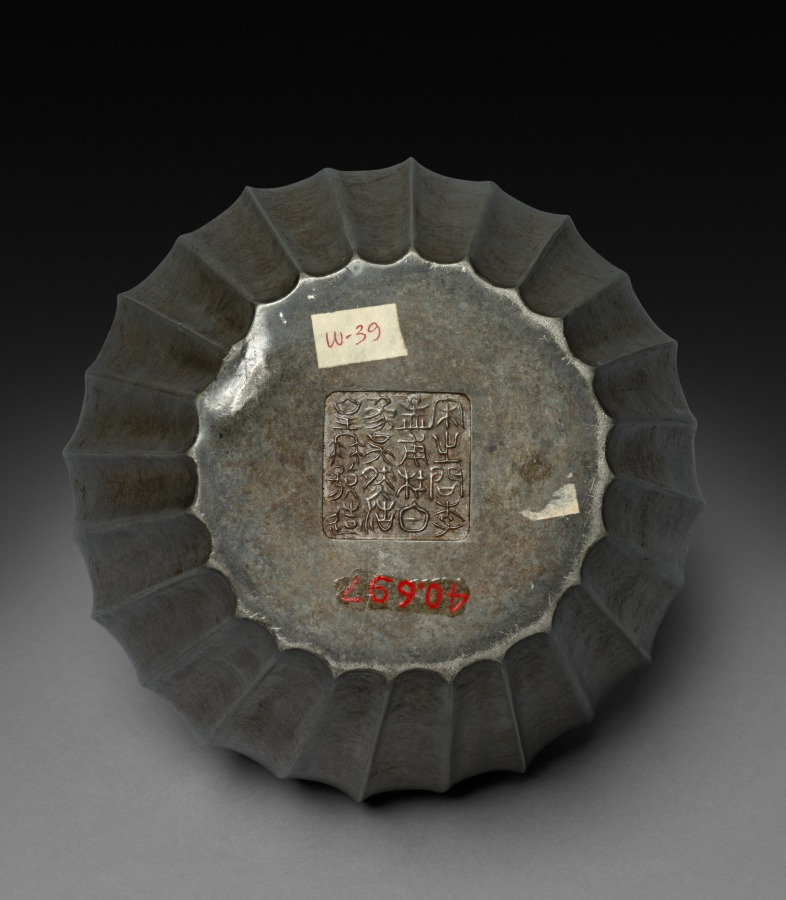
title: Jar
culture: Japan, Edo period (1615–1868)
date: 1600s-1800s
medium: pewter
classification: Metalwork